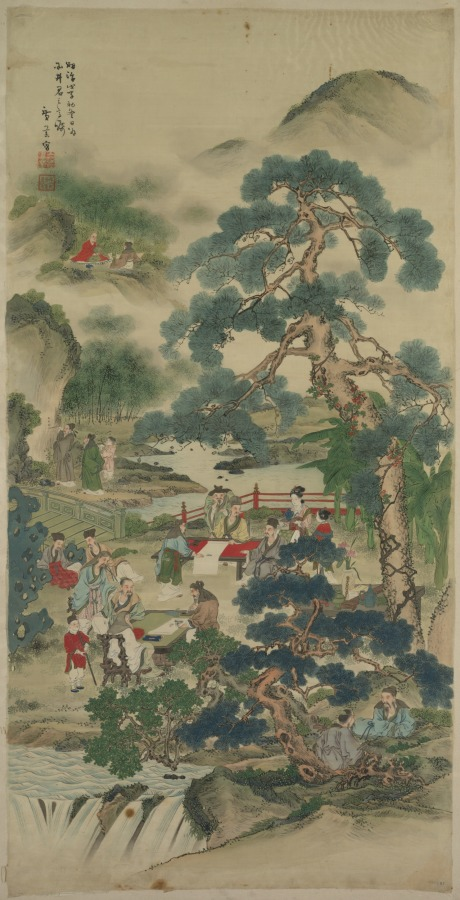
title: Chinese Sages in a Garden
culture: Japan, Meiji period (1868–1912)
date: 1888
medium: ink and color on silk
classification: Painting